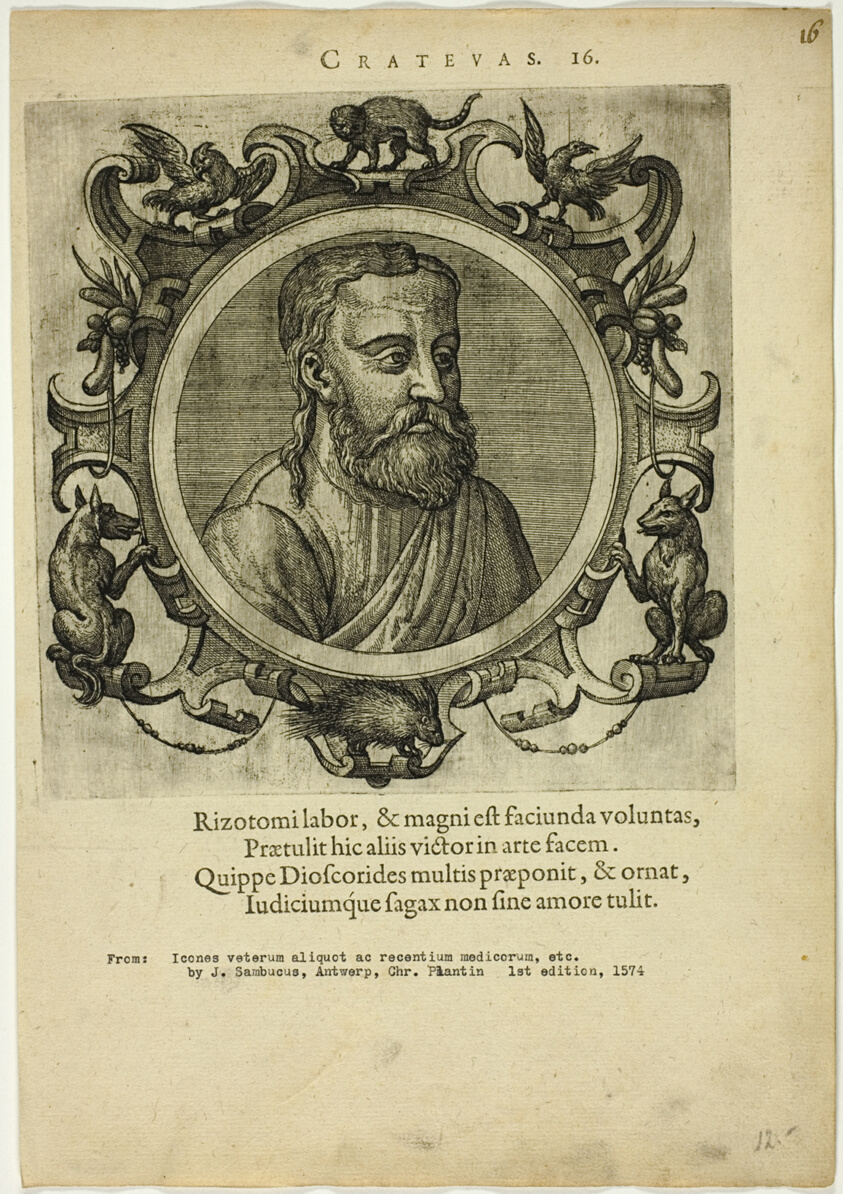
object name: Print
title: Portrait of Crateuas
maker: Unknown Artist (Flemish); written by Johannes Sambucus (Flemish, 1531-1584)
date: published 1574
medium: Etching, with engraving, on cream laid paper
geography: Flanders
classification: etching; print; prints and drawing